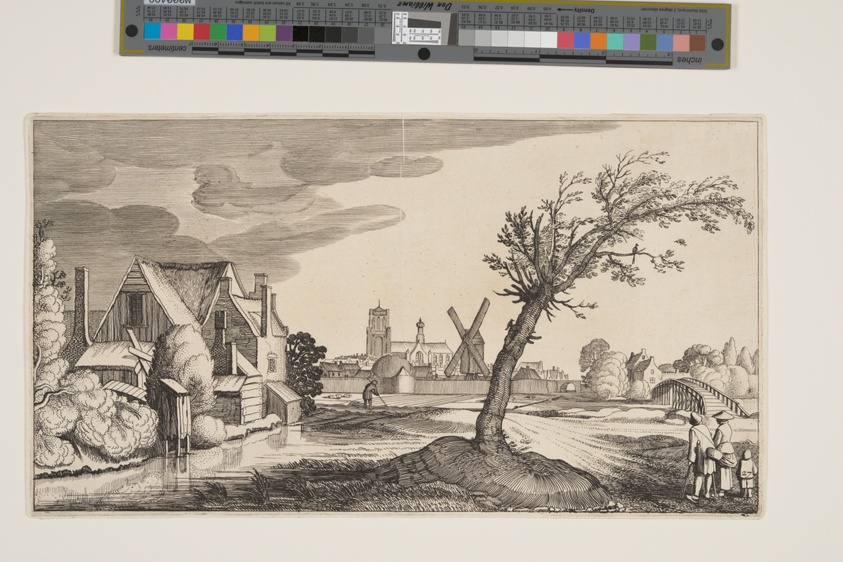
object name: Print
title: House on a Pond Outside a Town, from Landscapes (Playsante Lantschappen)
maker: Attributed to Claes Jansz. Visscher II (Dutch, 1586-1652); after Jan van de Velde II (Dutch, c. 1593-1641)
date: c. 1641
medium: Etching, with engraving, on ivory laid paper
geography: Netherlands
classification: etching; paper; print; prints and drawing